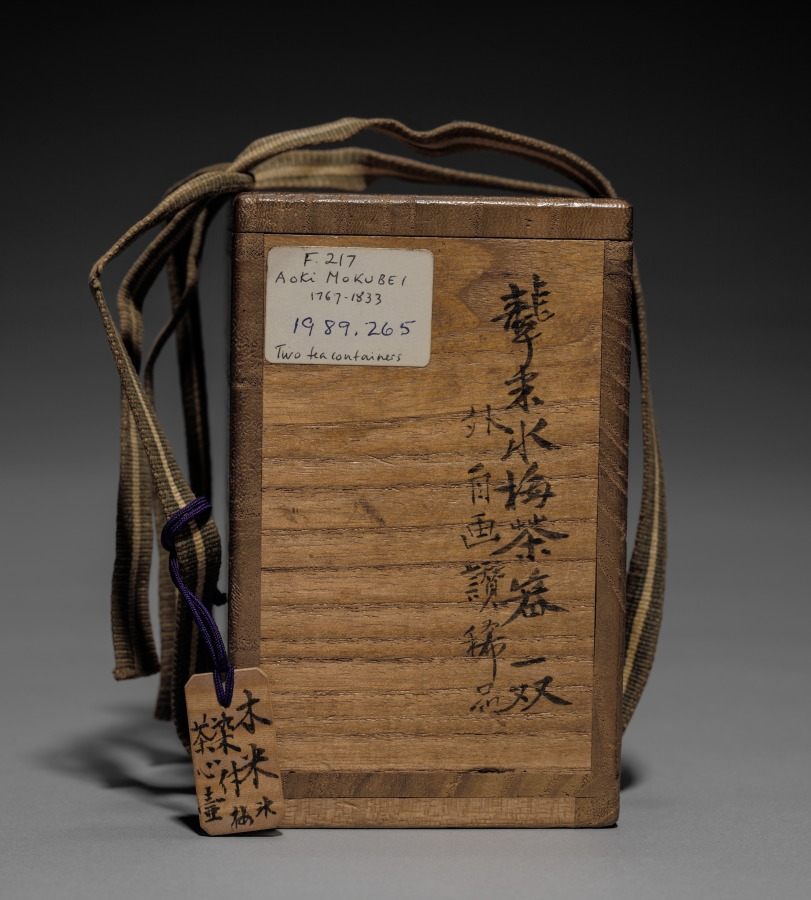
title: Pair of Tea Containers with Plum Blossoms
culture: Japan, Edo period (1615–1868)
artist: Aoki Mokubei (Japanese, 1767–1833)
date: early 1800s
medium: porcelain with underglaze blue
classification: Ceramic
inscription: signed "Ro Mokubei" on base in underglaze blue.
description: Aoki Mokubei, born into a family of restaurateurs, was a potter, calligrapher, painter, and scholar, and is considered one of the three masters of later Edo period Kyoto ceramics. He specialized in porcelains fashioned after Chinese prototypes, and created works for steeped tea (sencha) such as these matching tea caddies decorated in an underglaze blue called sometsuke—literally “with applied dye.” He signed them on their bottoms. They also have intricately patterned silk sleeves to both beautify and protect them. On the exterior of the lid of the outer wooden box that contains them, it is written that Mokubei inscribed and painted an image on the box. On the interior of the lid, the signature and seals of a former owner are written. Mokubei has signed the lid of the inner box, and a charming ink and light color composition of West Lake in Hangzhou in China covers its three sides. On the fourth side is a long inscription by Mokubei describing the scene.